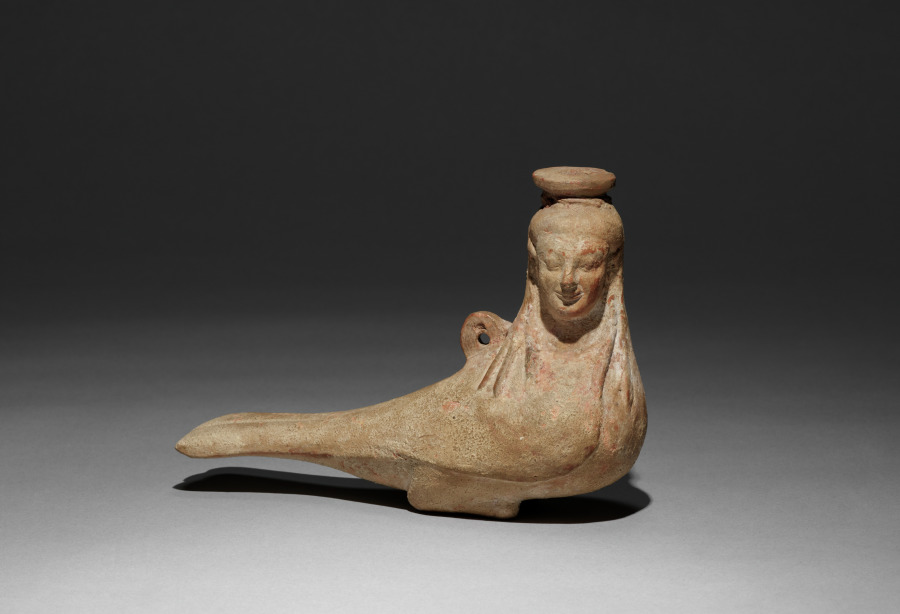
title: Siren-Shaped Perfume Flask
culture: Greece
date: 600–480 BCE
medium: terracotta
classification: Sculpture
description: A half-bird, half-woman creature, a siren lured sailors to death by the sweetness of her song. The most famous sirens appear in the ancient epic the Odyssey. Shaped like a siren, this vessel likely held valuable perfumed oil. Its small mouth limited spillage, and a string attached to the loops on its back allowed it to hand or hold a stopper.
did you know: In the Odyssey, Odysseus’s crew escapes the sirens by plugging their ears with wax.